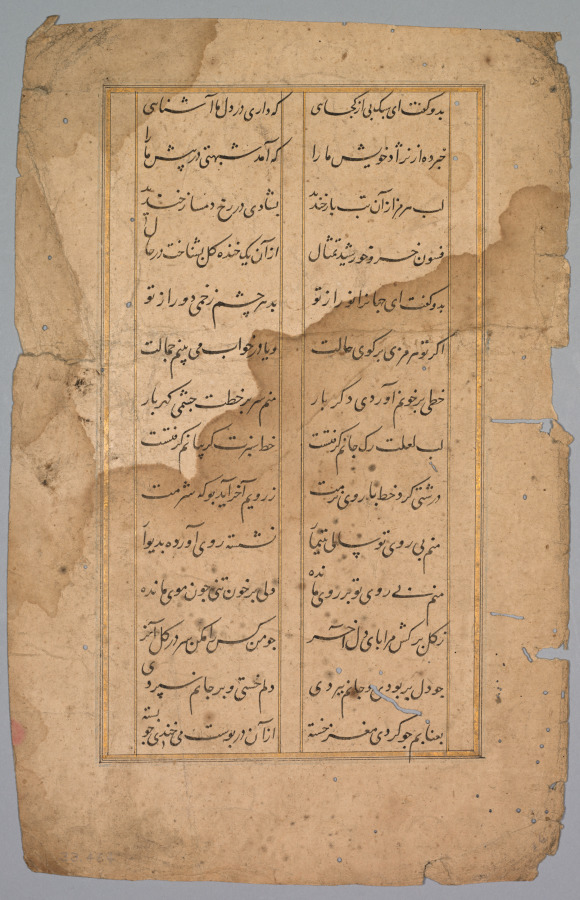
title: Page with Panel with Two Columns of Persian Writing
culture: India, Mughal Dynasty (1526-1756)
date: 18th century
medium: ink on paper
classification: Manuscript